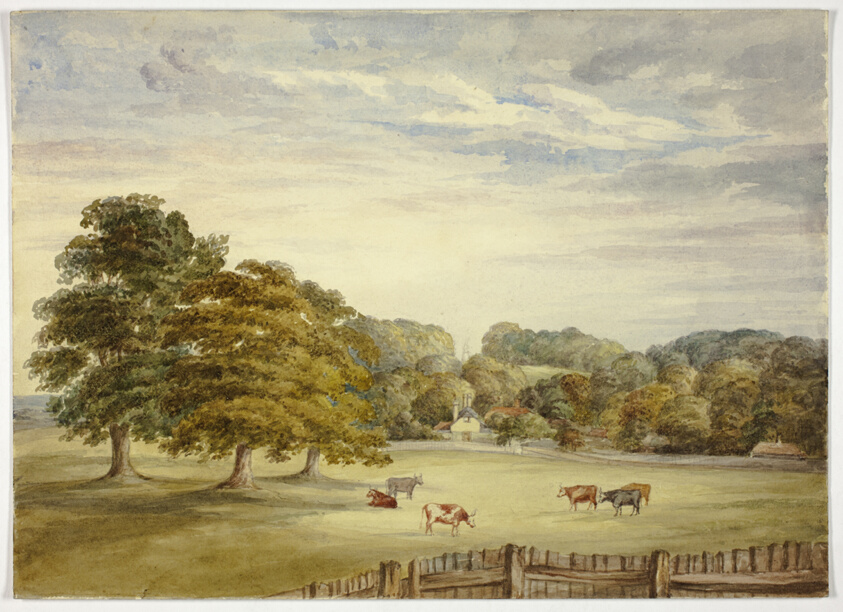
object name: Drawing and Watercolor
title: Six Cows Grazing before Country House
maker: Elizabeth Murray (English, c. 1815-1882)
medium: Watercolor over graphite on cream wove paper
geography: England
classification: watercolor; drawings (visual works); prints and drawing